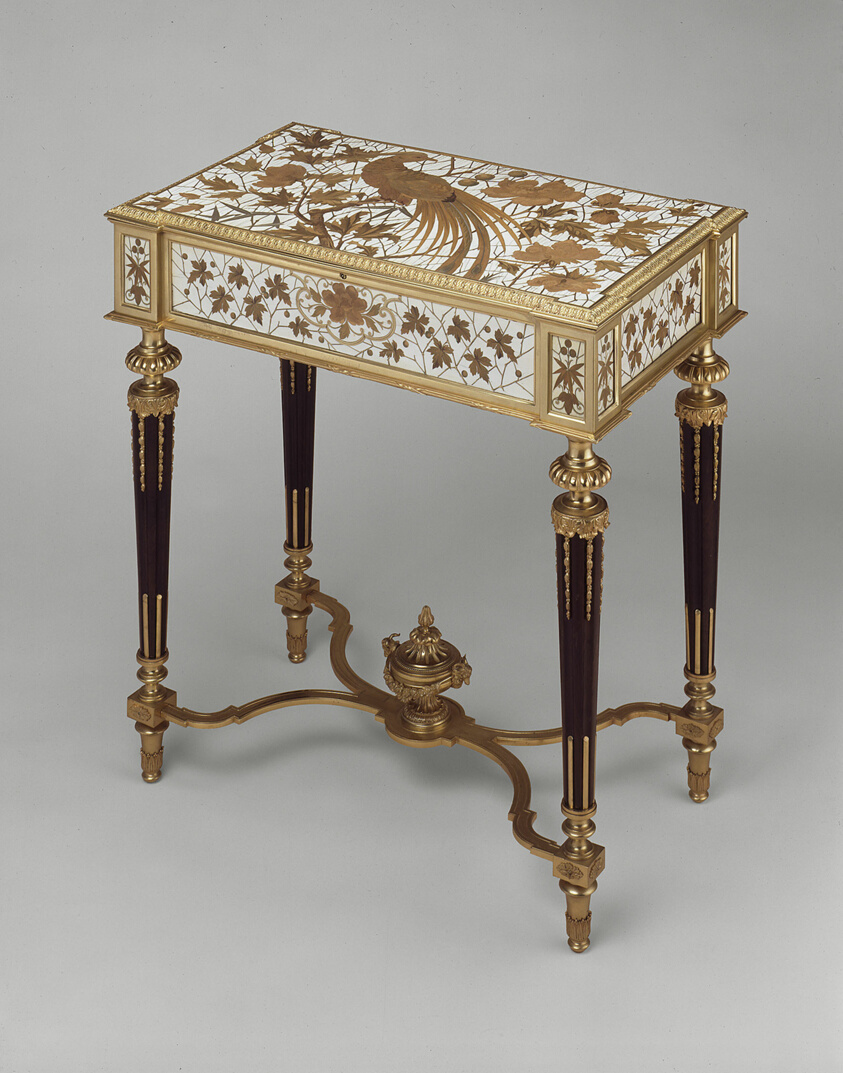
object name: Furniture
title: Work Table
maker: France, Paris; Maison Alphonse Giroux, Paris, under the direction of Veuve Duvinage (French, active 1874–1882)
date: c. 1880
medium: Rosewood, ivory, gilt bronze, brass, and pewter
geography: France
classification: table; furniture; european decorative arts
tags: furniture